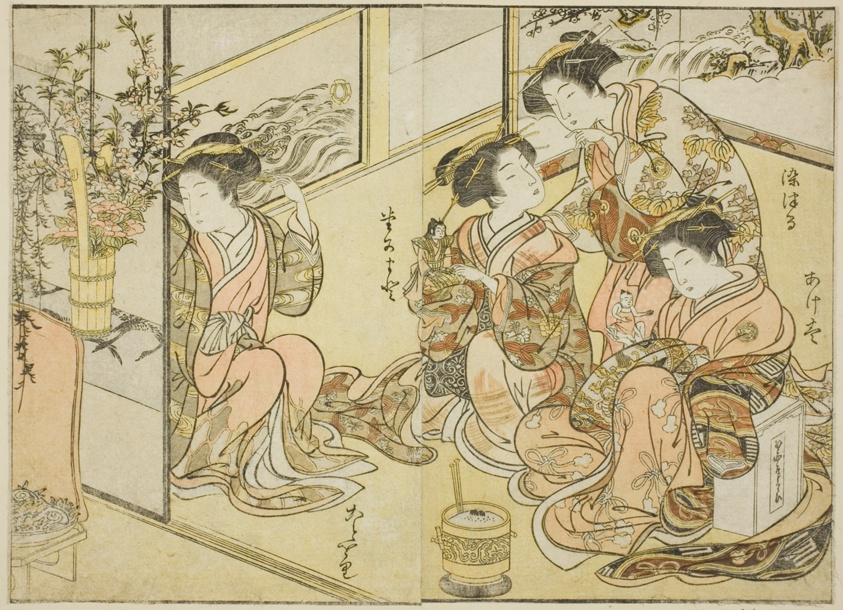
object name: Print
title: Courtesans of the Matsuneya, from the book "Mirror of Beautiful Women of the Pleasure Quarters (Seiro bijin awase sugata kagami)," vol. 1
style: Japanese (culture or style)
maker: Katsukawa Shunsho; Japanese, 1726-1792; Kitao Shigemasa; Japanese, 1739-1820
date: 1776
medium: Color woodblock print; double-page illustration cut from a book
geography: Japan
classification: woodblock print; print; asian art